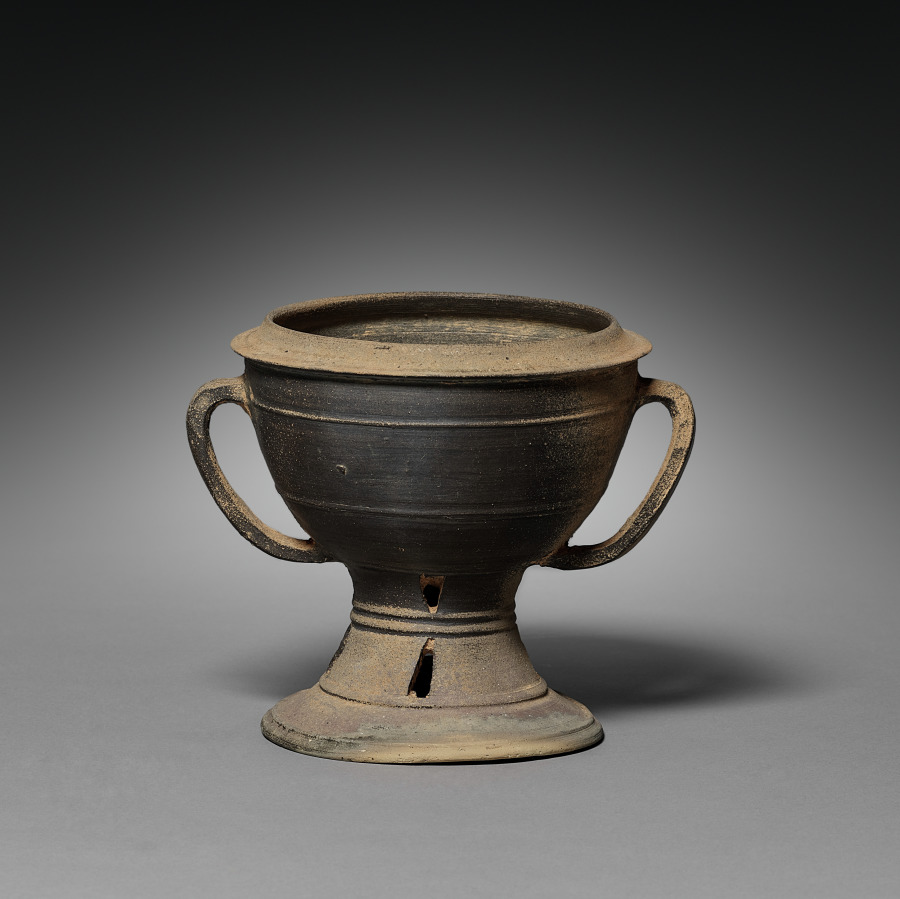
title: Lidded Cup with Strap Handles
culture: Korea, Gaya period (42–562 CE)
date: 300s–400s CE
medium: stoneware with natural ash glaze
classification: Ceramic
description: Pottery vessels with a footed stand such as this one is the earliest known high-fired ware. Its gray color is the result of the reduction of oxygen in the closed kiln chamber. Footed vessels were not for everyday usage, but rather served to present offerings to the deceased.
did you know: A series of triangular cutouts shown on the bottom are standard features of Kaya pottery.